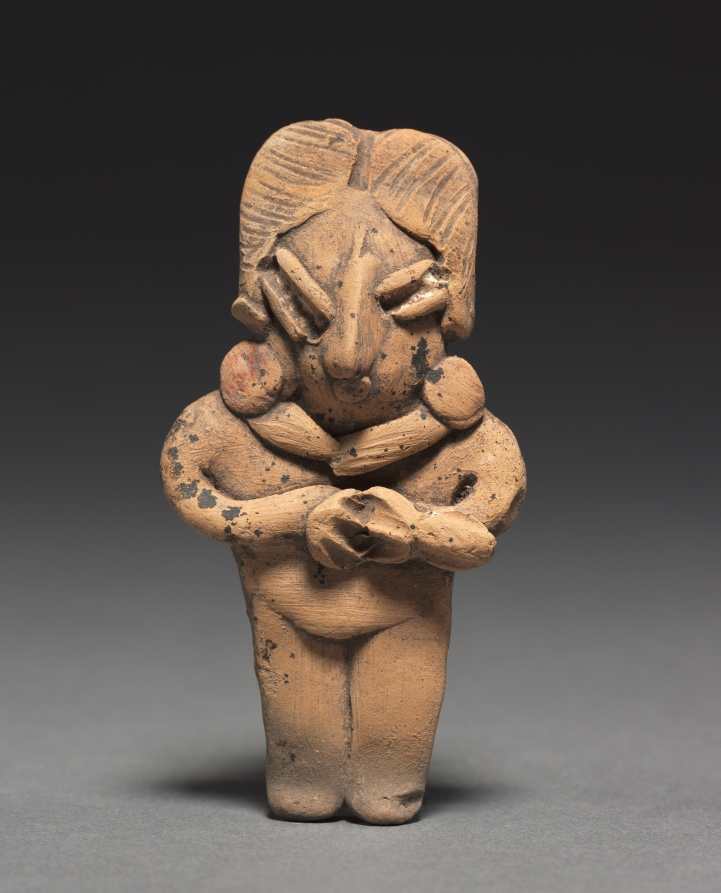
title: Male Figurine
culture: Mesoamerica, Mexico, Guanajuato, Chupícuaro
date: 400–100 BCE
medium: pottery with traces of white and red pigment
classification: Sculpture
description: The Chupícuaro culture, located north of Mexico City in the state of Guanajuato, created a distinctive ceramic tradition including small clay figurines. This example is said to belong to a group of ten figurines from the same burial or cache (1990.145–154). The group includes both males and females that can be sorted into couples based on size.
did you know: Groups of figurines were sometimes arranged in scenes and likely used in household rituals.